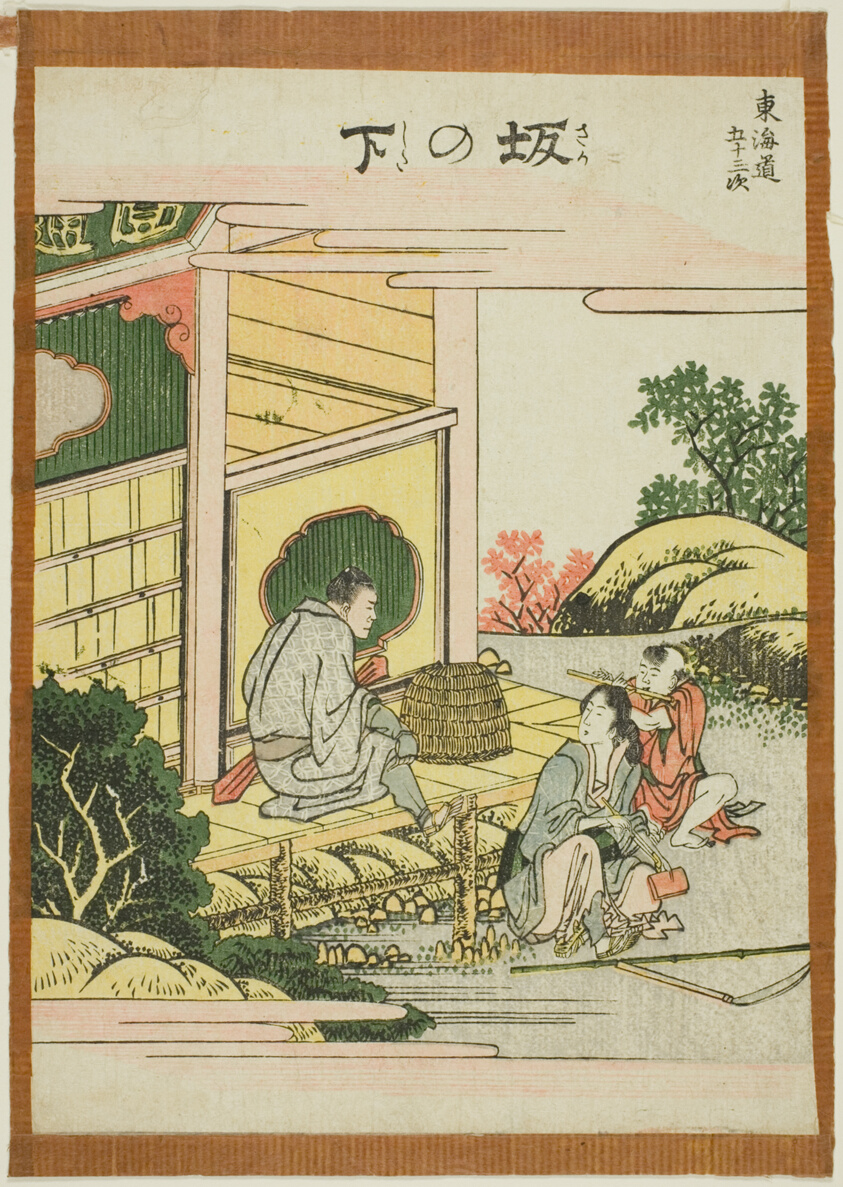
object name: Print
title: Sakanoshita, from the series "Fifty-three Stations of the Tokaido (Tokaido gojusan tsugi)"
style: Japanese (culture or style)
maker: Katsushika Hokusai 葛飾 北斎; Japanese, 1760-1849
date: c. 1806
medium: Color woodblock print; chuban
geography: Japan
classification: woodblock print; print; asian art